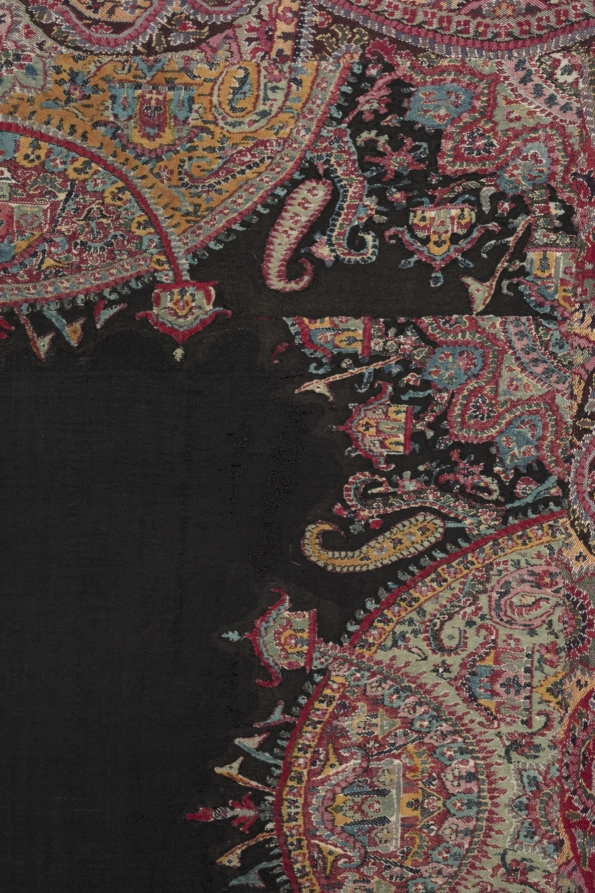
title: Long Shawl with Black Center and Exotic Four-Sided Gallery in Chinoiserie Style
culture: India, Kashmir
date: 1840s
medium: wool; 2/2 twill tapestry (S), double interlocked, pieced, refreshed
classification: Textile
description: This expensive woven shawl has been refreshed—that is, its outdated designs have been replaced with beautiful new decoration. Overlapping pairs of botehs, or paisleys, enliven the original end panels (pallava) whereas the area around the central black rectangle was updated with an exotic four-sided gallery featuring ships, buildings, and flags that suggest Chinese influence. This stunning shawl is composed of seven almost invisibly joined pieces. One large section contains both ends and the continuous side borders while six pieces create the space in the middle. When the shawl was refreshed with the new chic gallery, black pigment—hardly visible—was applied along the edges of the central black section. The inscription may identify the textile’s quality or material content.